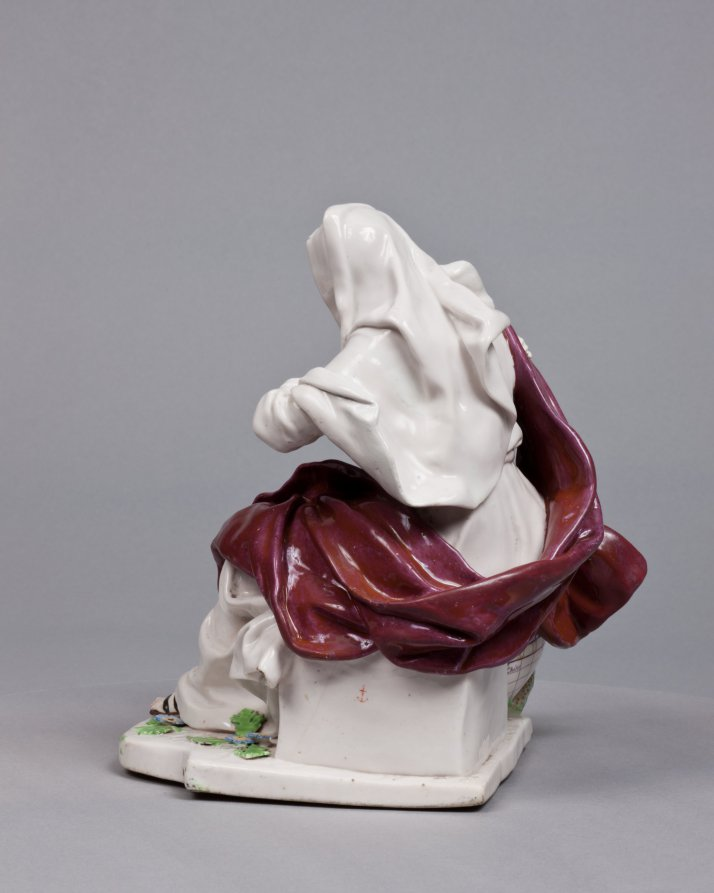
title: Madonna and Child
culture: England, Chelsea, 18th century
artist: Chelsea Porcelain Factory (Britain, London, 1745–84)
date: c. 1755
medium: porcelain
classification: Ceramic